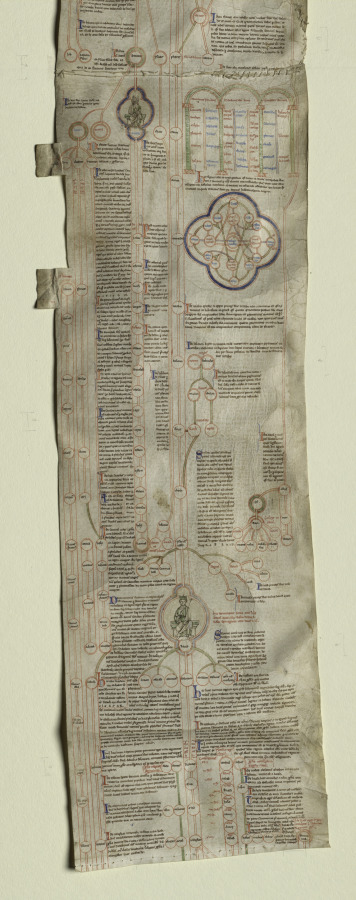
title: Peter of Poitiers's "Compendium Historiae in Genealogia Christi"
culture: England, Canterbury, 13th century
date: c. 1220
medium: ink and tempera on a vellum roll of four membranes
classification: Manuscript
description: This manuscript roll, composed of four membranes formerly stitched together in a continuous roll about nine feet long, has been divided in the middle for easier visibility and study. The text is an abridgment of biblical history focused on the descent of Christ from Adam. It was written by Peter of Poitiers (about 1130–1205), who taught theology and history in Paris and was widely copied. The present roll is an English copy of Peter's text made shortly after his death. Although manuscript rolls were hung on the walls of a classroom as instructional aids to students, some of them have value beyond their textual and historical interest because of the fine quality of their drawings, as seen here. A comparison with Canterbury manuscripts and stained glass of around 1220 is the basis for the attribution to Canterbury. Peter of Poitiers's aim in this project was to assist students prevented from mastering biblical history because of its length and because they were too poor to own books. His text on roll is the briefest possible summary of biblical history. It is arranged in six historical stages, denoting the six ages of the world, as decreed by theological tradition. The first five ages were inaugurated by Old Testament individuals: Adam, Noah, Abraham, David, and Sedecias. The birth of Christ heralded the sixth stage. Beginning at the top of the first membrane, the text consists of brief biographical entries on the ancestors of Christ (Adam, Noah, Abraham, Moses, and David) and other biblical personalities. These extend to the birth of Christ on the fourth membrane, ending with accounts of Hebrew and Roman kings and the Apostles. Each compendium shows the names of the ancestors inscribed within circles, those of direct descent placed vertically in a central column, others scattered in clusters to the right and left. The decoration of the roll consists of a series of medallions of diverse geometrical frames filled with either a figural drawing or a diagram. The style of these pen-and-ink drawings, some illuminated in tempera or tinted with wash, stems from English manuscript and glass painting attributed to the school of Canterbury Cathedral. The style of the museum's illustrations is so close to the stained glass panels made for Trinity Chapel at Canterbury (about 1220) to suggest that an artist active as a glazier in the Cathedral workshop may also have executed the manuscript. In the least, the painter of the roll manuscript was familiar with the style of the painted glass, and on this basis, a date of about 1220 seems appropriate. Additional evidence is supplied by a psalter illuminated at Canterbury shortly before 1220. The figurative scenes in this psalter were apparently illustrated by the same hand that executed the line and wash drawings in the museum's roll.